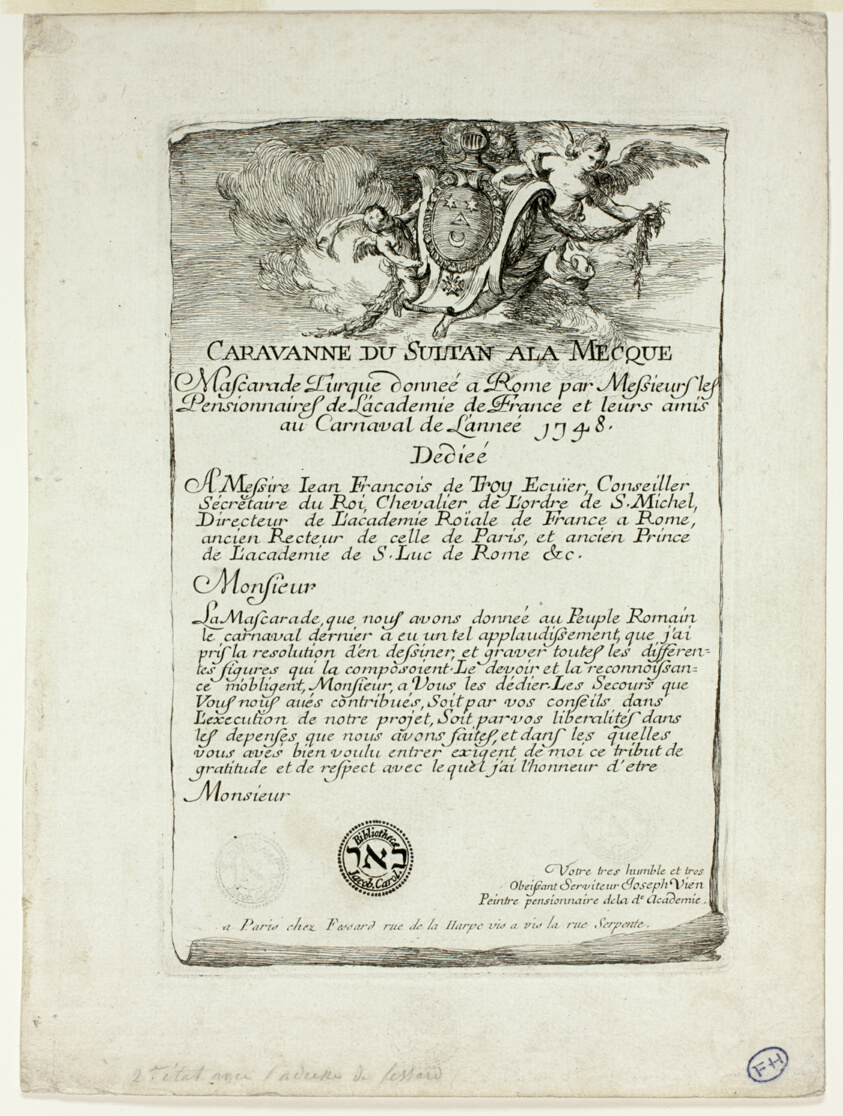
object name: Print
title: Title Page, from Caravanne du Sultan à la Mecque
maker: Joseph-Marie Vien, the elder; French, 1716–1809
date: 1748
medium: Etching on ivory laid paper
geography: France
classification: etching; paper; print; prints and drawing